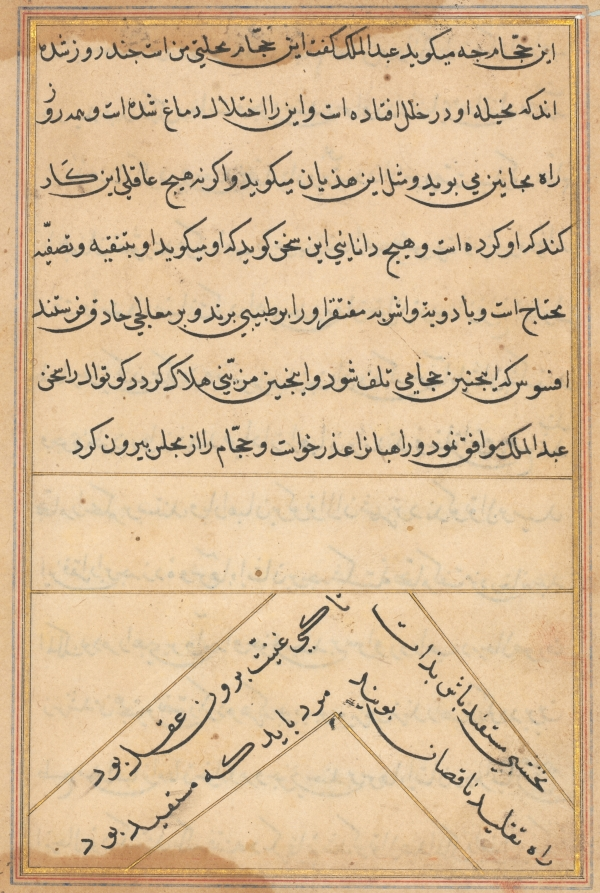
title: Page from Tales of a Parrot (Tuti-nama): text page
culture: Mughal India, court of Akbar (reigned 1556–1605)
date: c. 1560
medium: gum tempera, ink, and gold on paper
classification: Painting